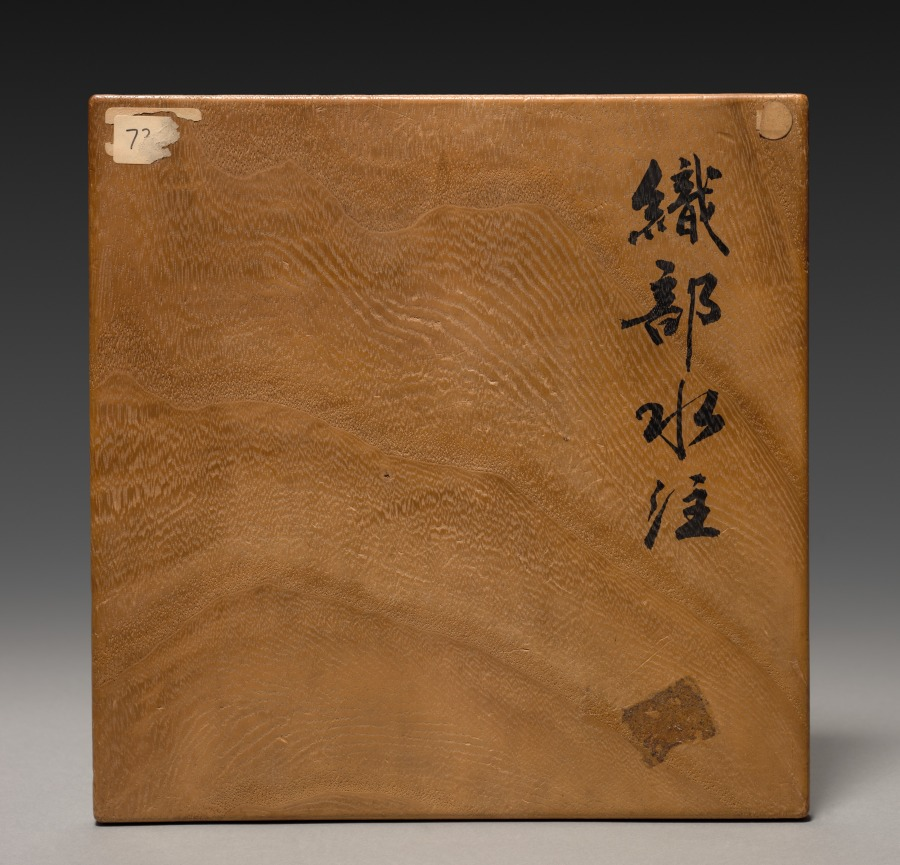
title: Ewer (Suichū)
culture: Japan, Momoyama period (1573–1615)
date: early 1600s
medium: Glazed stoneware with iron oxide underglaze slip (Mino ware, Oribe type)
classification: Ceramic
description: This ewer was made to replenish the jar that holds water for rinsing teabowls and filling the iron kettle at tea gatherings. Highly abstracted pine trees, cascading ivy, stripes, and grids make up the designs in underglaze iron oxide, while the overall surface alternates between a transparent glaze and a green glaze characteristic of some Oribe tea wares.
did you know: Oribe wares are named for the tea master Furuta Oribe, who initiated the flamboyant designs that characterize them.